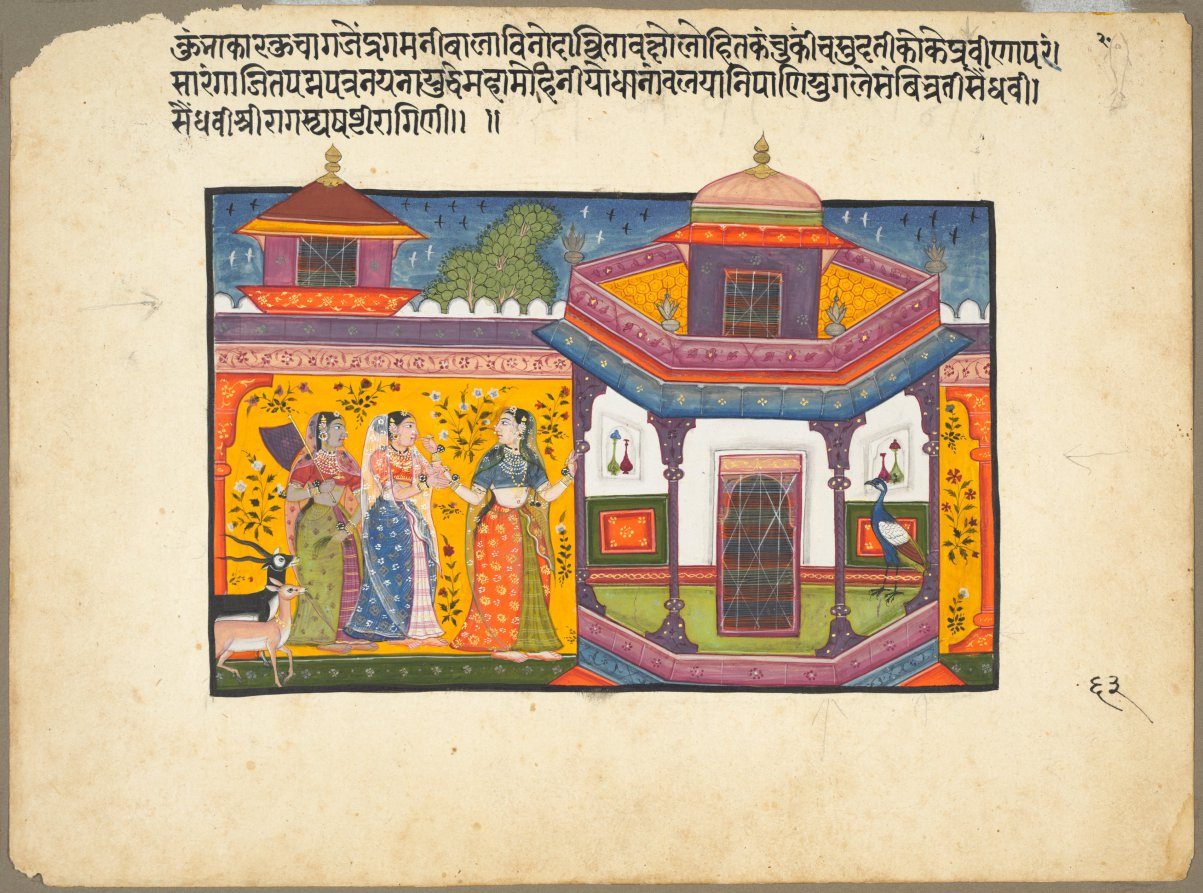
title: Saindhavi Ragini of the "Sri Raga" Family, page from a Ragamala Series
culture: India, Popular Mughal school, 17th century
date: 1600–1610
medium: Gum tempera, ink, and gold on paper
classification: Painting